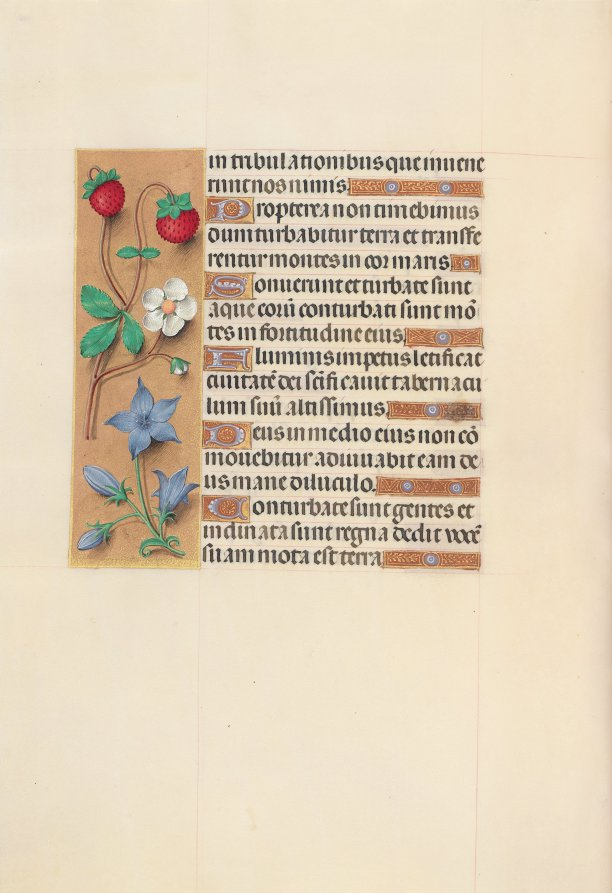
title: Hours of Queen Isabella the Catholic, Queen of Spain: Fol. 105v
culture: Flanders, Ghent and Bruges, late 15th century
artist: Master of the First Prayerbook of Maximillian (Flemish, c. 1444–1519)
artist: and Associates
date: c. 1500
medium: ink, tempera, and gold on vellum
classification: Bound Volume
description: This manuscript was illuminated by a circle of at least five highly organized manuscript painters active in the Flemish cities of Ghent and Bruges. The principal illuminator was Alexander Bening, who painted the majority of the book's miniatures. Manuscripts produced by this circle of artists are renowned for the decoration of their borders, which typically feature a rich variety of realistically-painted flowers, birds, and butterflies. This prayer book, called a book of hours, was intended not for a cleric, but for the private devotions of a lay person-in this case, Isabella the Catholic, Queen of Spain (1451-1504). Isabella's coat of arms embellishes the book's frontispiece. It is unlikely that the book was commissioned by the Queen herself; rather, she probably received it as a diplomatic gift from someone courting her patronage, perhaps Cardinal Francisco Jimenez de Cisneros. A Franciscan friar, Jimenez was dependent upon Isabella for his advancement, first to the post of Queen's confessor in 1492, and then to Archbishop of Toledo in 1495.